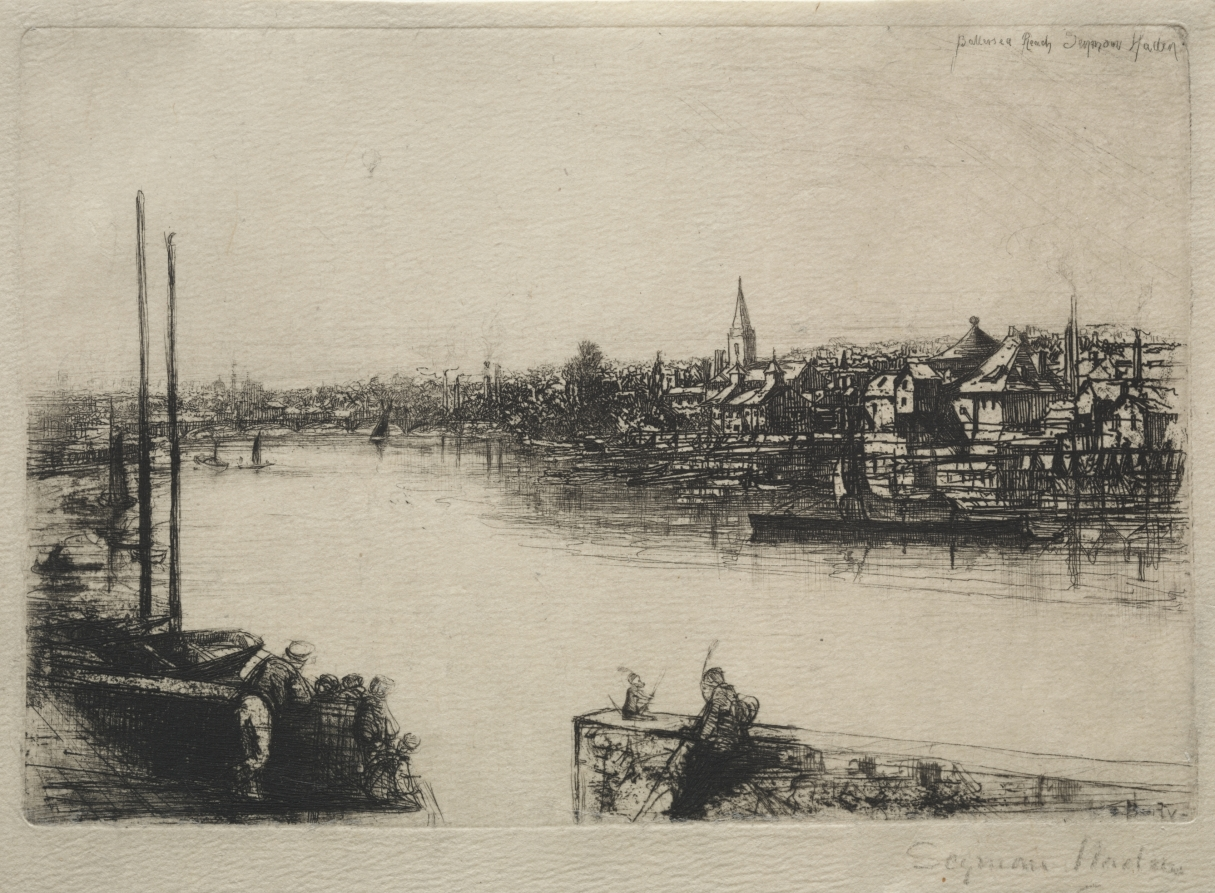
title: Battersea Reach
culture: England, 19th century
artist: Francis Seymour Haden (British, 1818–1910)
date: 1843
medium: etching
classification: Print